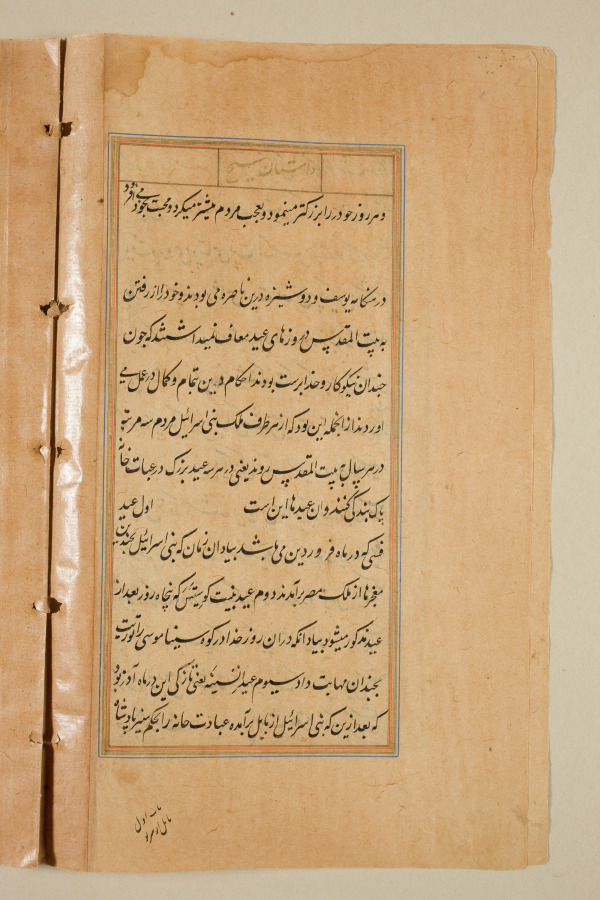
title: Text page from a Mirror of Holiness (Mir’at al-quds) of Father Jerome Xavier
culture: Mughal India, Allahabad, made for Prince Salim (1569–1627)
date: 1602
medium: Ink and gold on paper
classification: Manuscript